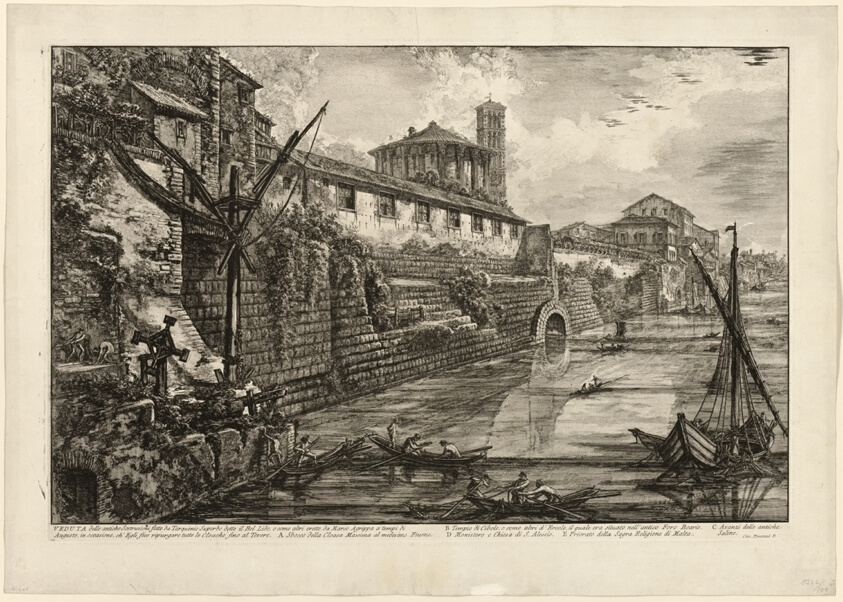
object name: Print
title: View of the ancient structure built by Tarquinius Superbus called the Bel Lido, and like others, built by Marcus Agrippa in the time of Augustus when he cleaned all of the sewers leading to the Tiber, from Views of Rome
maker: Giovanni Battista Piranesi (Italian, 1720-1778); published by Francesco (Italian, 1758-1810) and Pietro Piranesi (Italian, born 1758/9)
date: 1776, published 1800–07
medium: Etching on heavy ivory laid paper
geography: Italy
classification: etching; print; prints and drawing